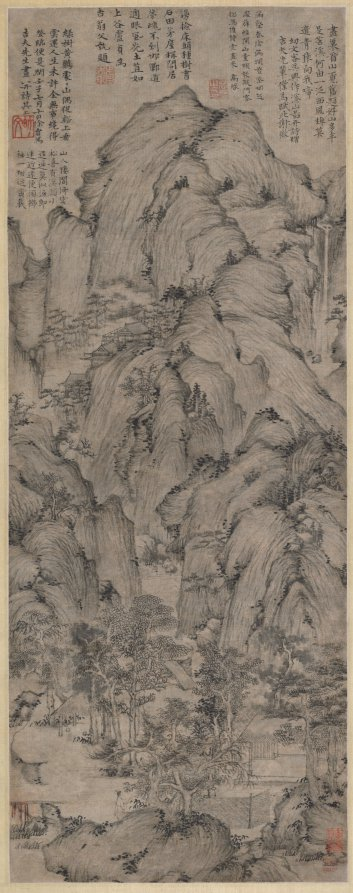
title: Streams and Mountains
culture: China, Yuan dynasty (1271-1368)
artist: Xu Ben (Chinese, 1335–1380)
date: 1372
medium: hanging scroll, ink on paper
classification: Painting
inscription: 綠樹黃鸝處處山， 偶從谿上看雲還。/ 人生未許全無事， 纔得登臨便是閑。 壬子七月十日徐賁為吉夫先生畫 並詩共上 [印] 幼文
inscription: Label on mounting probably by Liang Qingbiao 梁清標 (1620–1691).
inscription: 4 additional inscriptions and 9 additional seals: 1 poem of Xie Hui 謝徽 (c. 2nd half 14th c.); 1 poem and 1 seal of Gao Qi 高啟 (1336–1374); 1 poem and 1 seal of Lu Zhen 盧貞 (c. late 14th c.); 1 poem of Huang Zai 黃載; 3 seals of Liang Qingbiao 梁清標 (1620–1691); 1 seal of Wang Jiqian [C. C. Wang] 王季遷 (1907–2003); 3 seals unidentified.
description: Like many literati of the late Yuan and early Ming dynasties, Xu Ben was entangled with the perils of dynastic change as well as the ups and downs of his official career. It was mainly through the art of painting and poetry, as well as the ideal of reclusion, that he sought feelings of exhilaration and shared them with his friends. Xu created this monumental landscape during one of his periods of reclusion. His innumerable “hemp-fiber” texture strokes create a unifying rhythm among the towering mountains with tightly knit masses of rocks. Nestled among shady trees at the base of the mountain is a rustic retreat, which a scholar approaches on foot to visit with the hermit. Among the five inscriptions at the top of the painting is one by the artist himself. He dedicated the painting to someone named Jifu 吉夫 and recorded a poem in praise of mountains. Green trees, yellow orioles, everywhere are mountains; Aimlessly I return from the stream, where I watched the clouds. Man's life does not allow unbroken ease, But to be able to be high up in the mountain, this is leisure.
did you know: An attendant opens a reed gate to welcome the scholar with a walking stick approaching the rustic retreat.